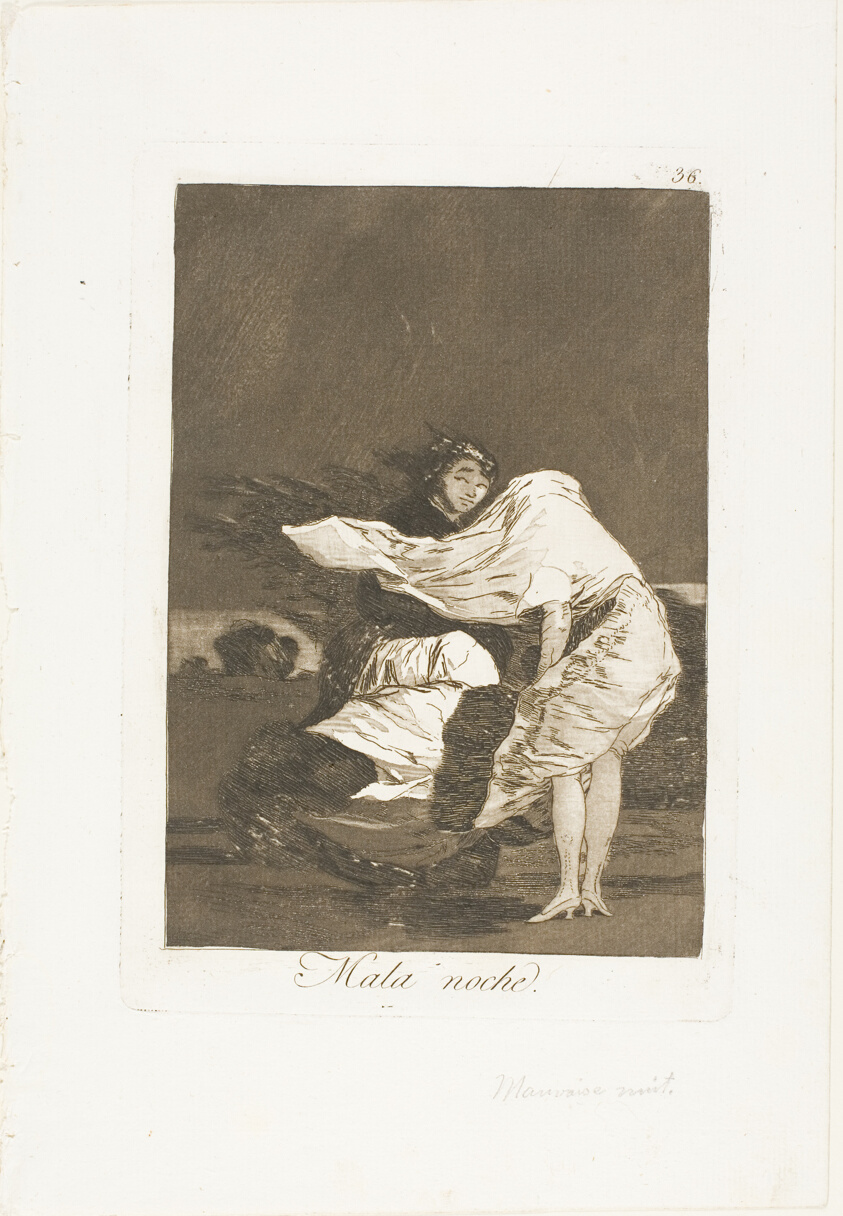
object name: Print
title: A Bad Night, plate 36 from Los Caprichos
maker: Francisco José de Goya y Lucientes (Spanish, 1746-1828)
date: 1797/99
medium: Etching and aquatint on ivory laid paper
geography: Spain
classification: etching; print; prints and drawing